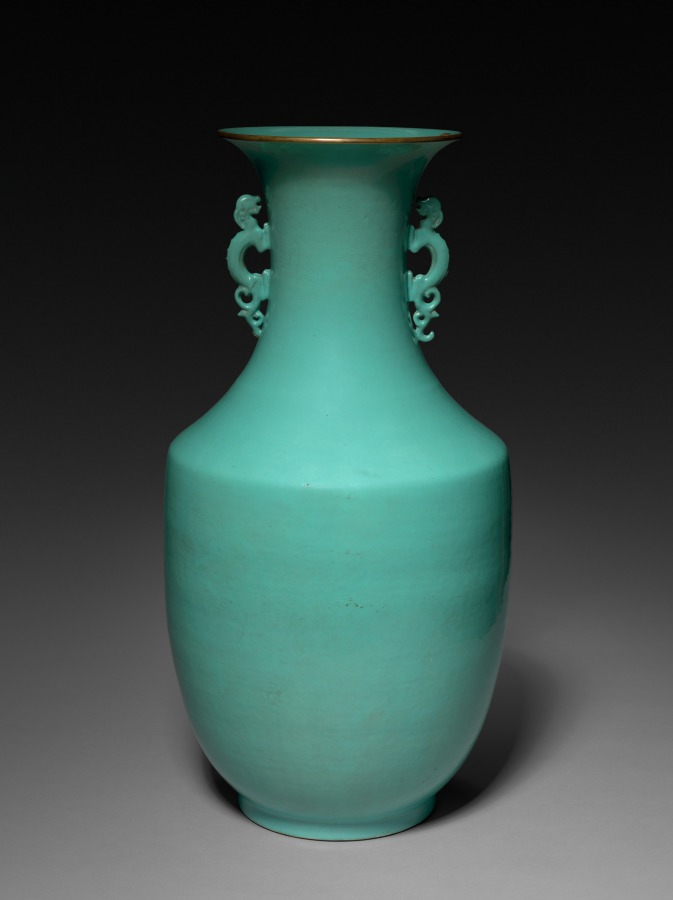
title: Vase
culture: China, Qing dynasty (1644–1911), Qianlong reign (1736–95)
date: 1736–95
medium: porcelain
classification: Ceramic